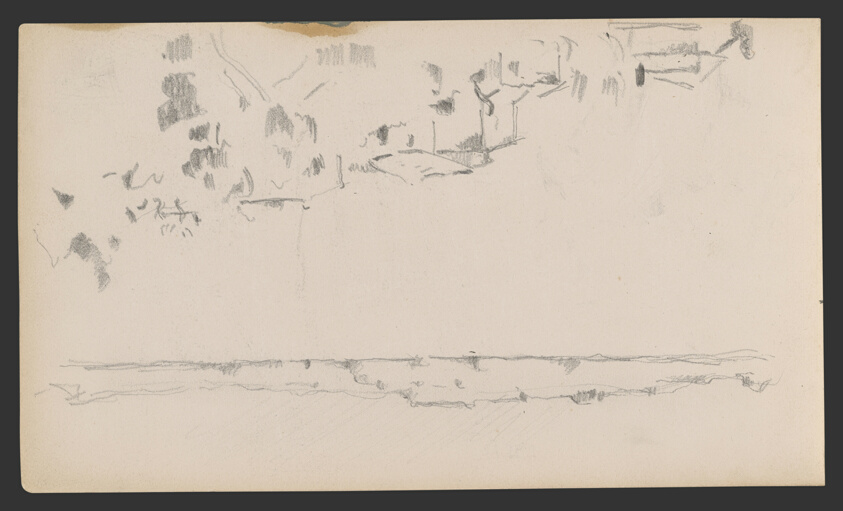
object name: Drawing and Watercolor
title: Sketchbook No. 2 (L'Estaque)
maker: Paul Cézanne; French, 1839-1906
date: 1875–86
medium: Graphite and pen and ink drawings on paper, bound into a book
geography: France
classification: sketchbook; graphite; prints and drawing; paper